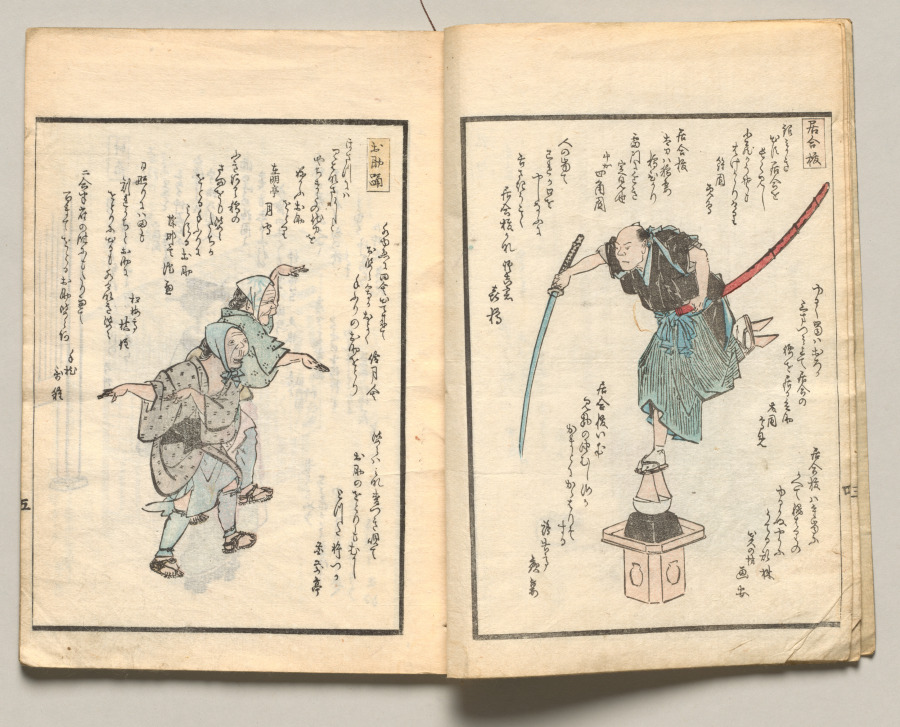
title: Spread Five from Volume Four of People of Japan in Light Verse (Kyōka)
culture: Japan, Edo period (1615–1868)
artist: Utagawa Hiroshige (Japanese, 1797–1858)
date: 1857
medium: Woodblock-printed book; ink and color on paper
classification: Bound Volume